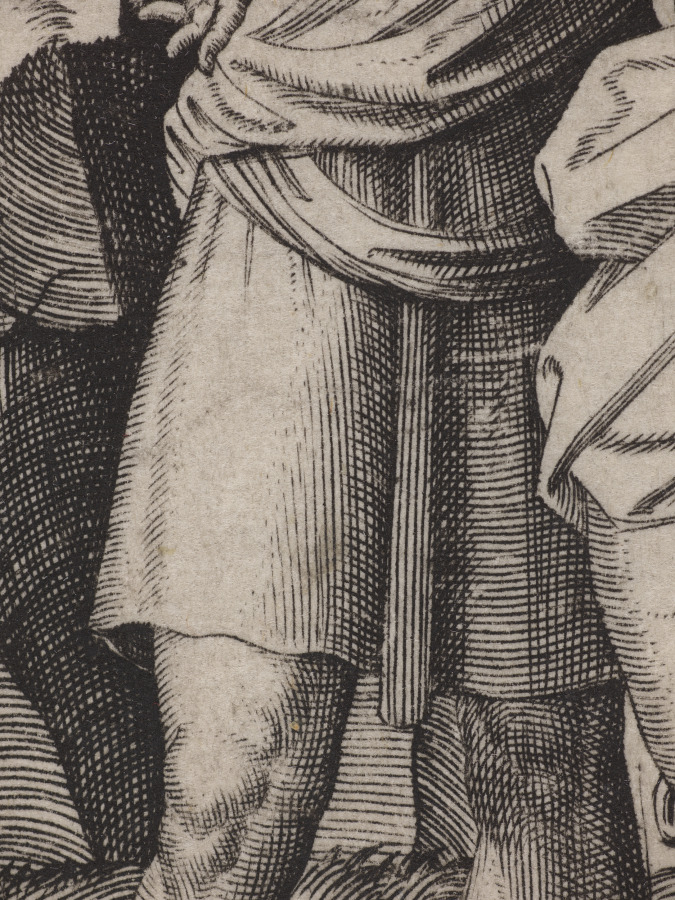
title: Apollo on Parnassus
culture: Italy, 16th century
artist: Marcantonio Raimondi (Italian, 1470/82–1527/34)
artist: after Raphael (Italian, 1483–1520)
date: c. 1517–20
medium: engraving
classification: Print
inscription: verso, lower left, in graphite: TR 13304/3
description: Around 1510, the influential painter Raphael began collaborating with the engraver Raimondi to translate his designs into prints, which allowed his works to reach an international audience. This engraving replicates Raphael’s design for a fresco he painted in the personal apartments of Pope Julius II (1443–1513), showing that devotion to classical ideas reached even the highest levels of religious authority. In addition to Apollo and his muses, Raphael portrayed some of history’s most celebrated poets on the Greek mountain Parnassus. On the left, next to a seated scribe, the ancient Greek poet Homer stands between the Latin poet Virgil (Roman, 70–19 BC) and the late medieval author Dante (Italian, about 1265–1321).